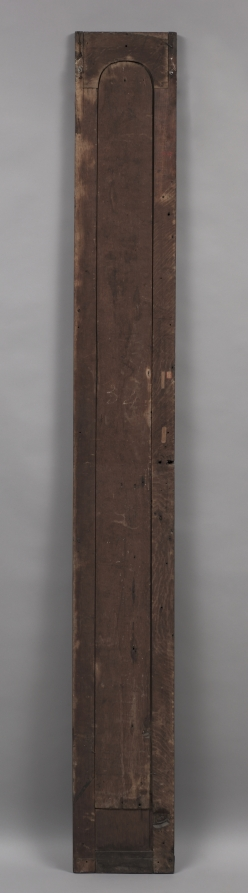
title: Panel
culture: France, Regency Period, 18th Century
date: 1715–1723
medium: wood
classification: Furniture and woodwork